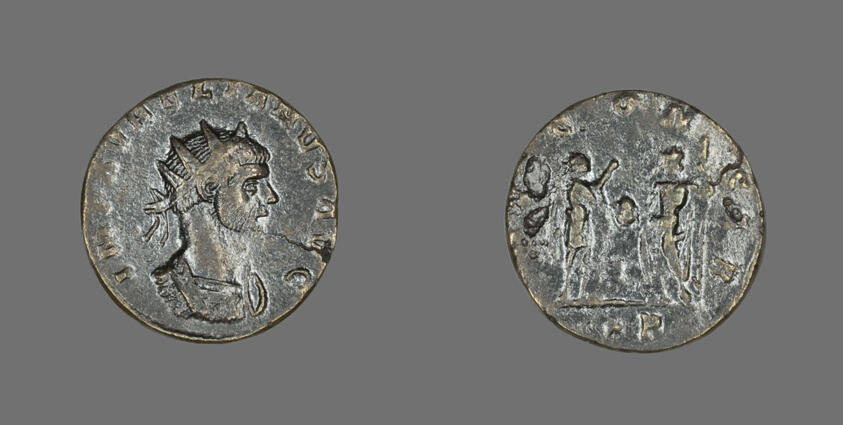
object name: Coin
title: Antoninianus (Coin) Portraying Emperor Aurelian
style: roman (ancient, style or period), ancient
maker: Roman, minted in Siscia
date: 270-275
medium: Billon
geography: Roman Empire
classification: coin; ancient art